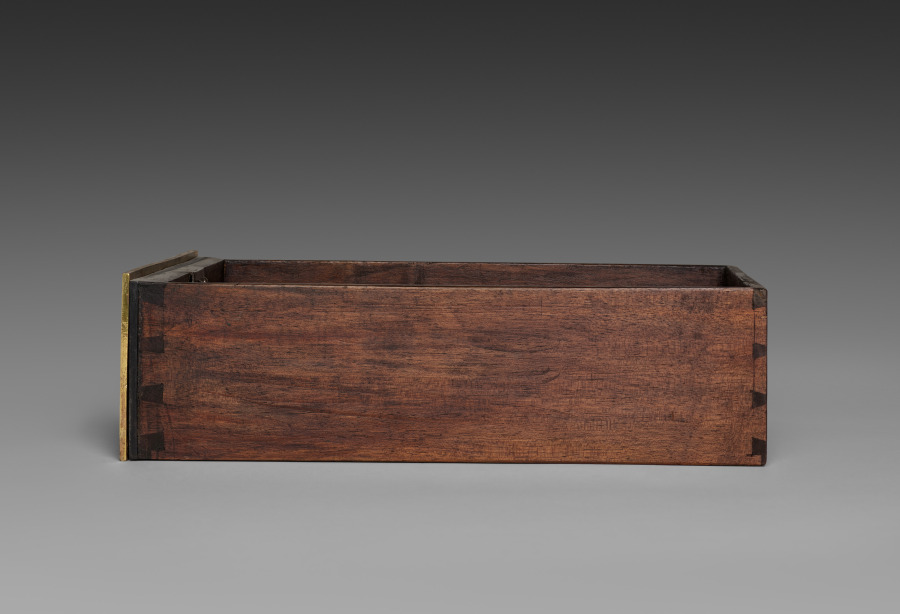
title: Side Drawer for Cabinet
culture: France, late 17th Century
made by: André-Charles Boulle (French, 1642–1732)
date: c. 1690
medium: ebony, marquetry in metal and tortoise shell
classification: Furniture and woodwork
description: Appointed cabinetmaker to King Louis XIV in 1672, André-Charles Boulle became a master of furniture making in France during the late 1600s until his death in 1732. Known primarily for his use of marquetry, in which metal patterns are inlaid into tortoiseshell then applied within the veneered surface of the furniture, Boulle established a level of quality and craftsmanship few others could achieve. As a result, his work found favor at the royal court and among other aristocrats and diplomats eager to impress the king. The inclusion of a medallion depicting Louis XIV within the bronze decoration of this chest would have identified the owner with the royal court. Often exhibiting stout architectural proportions with elegant groups of inlaid motifs such as the parrot on the central panel of this chest, Boulle’s designs are an example of the intellectual fashion for contrasting ideas, materials, and motifs.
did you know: Originally designed to sit atop an elaborate tall stand, this chest was likely altered in the late 1700s to reduce its scale and height.